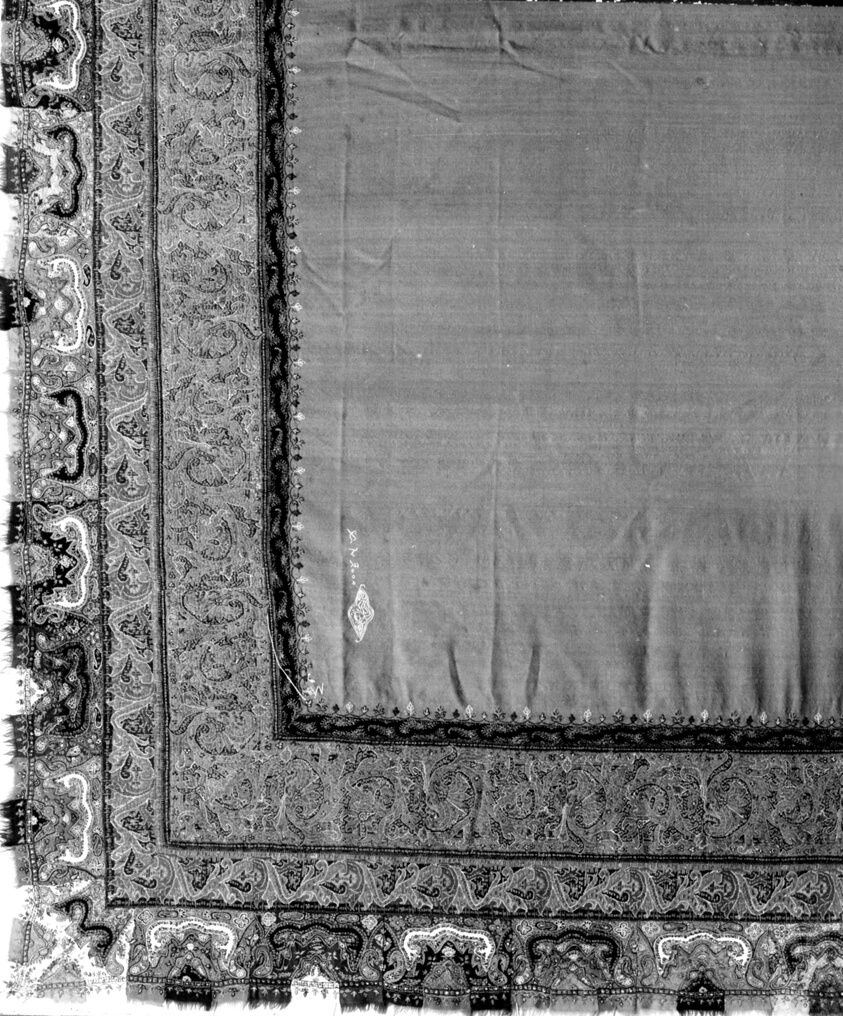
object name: Costume and Accessories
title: Shawl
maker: India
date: c. 1855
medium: Red center with white inscription; four applied borders; outside border is multicolor; embroidered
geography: India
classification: textile; weaving; costume; dress (garment); clothing